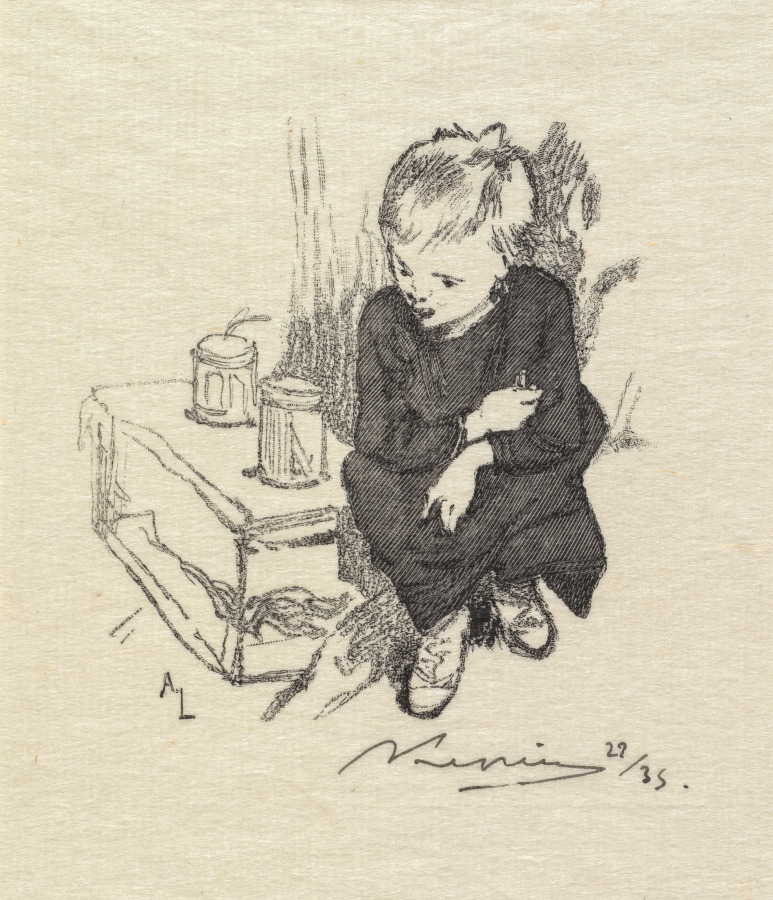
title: Fontainebleau Forest: Le gamin a l'orvet (La Forêt de Fontainebleau: Le gamin à l'orvet)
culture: France, 19th century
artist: Auguste Louis Lepère (French, 1849–1918)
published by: A. Desmoulins, Published in Revue Illustrée, 1887–90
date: 1890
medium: wood engraving from bound volume of 34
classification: Bound Volume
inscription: In block, lower left: AL; below image, lower right, in black ink: ALepère 22/35; on window mat, lower right, in graphite: Le gamin à l'orvet